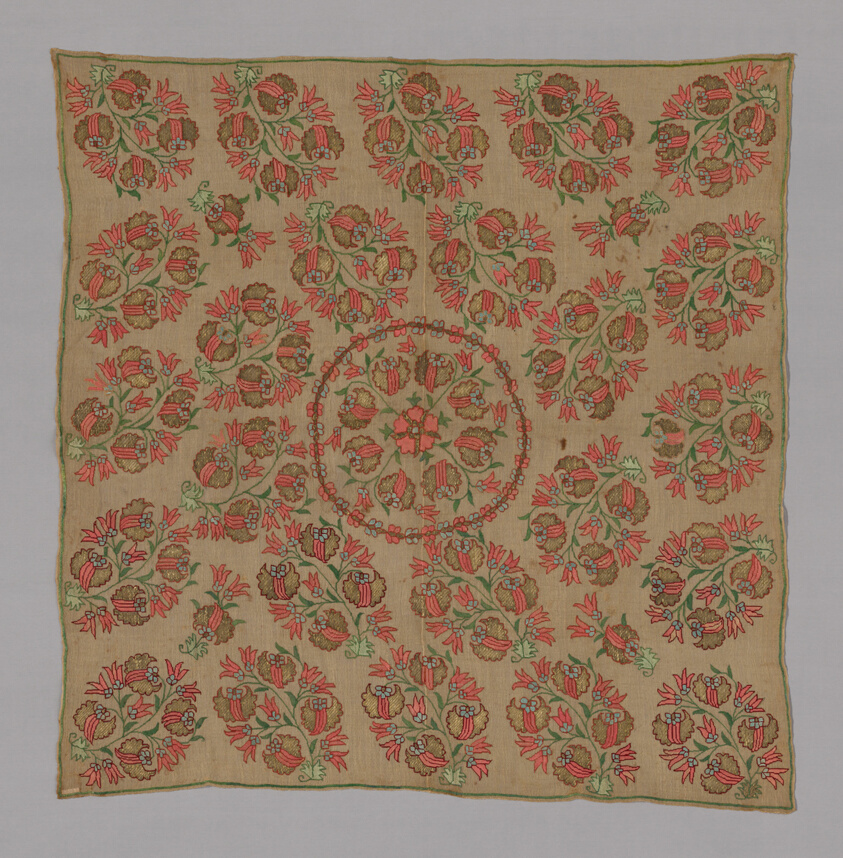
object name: Textile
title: Cover (possibly Turban Cover)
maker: Turkey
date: 18th century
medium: Linen, plain weave; embroidered with silk and gilt-metal-strip-wrapped silk in fishbone, overcast, and running stitches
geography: Turkey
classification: textile; needlework (visual works); weaving